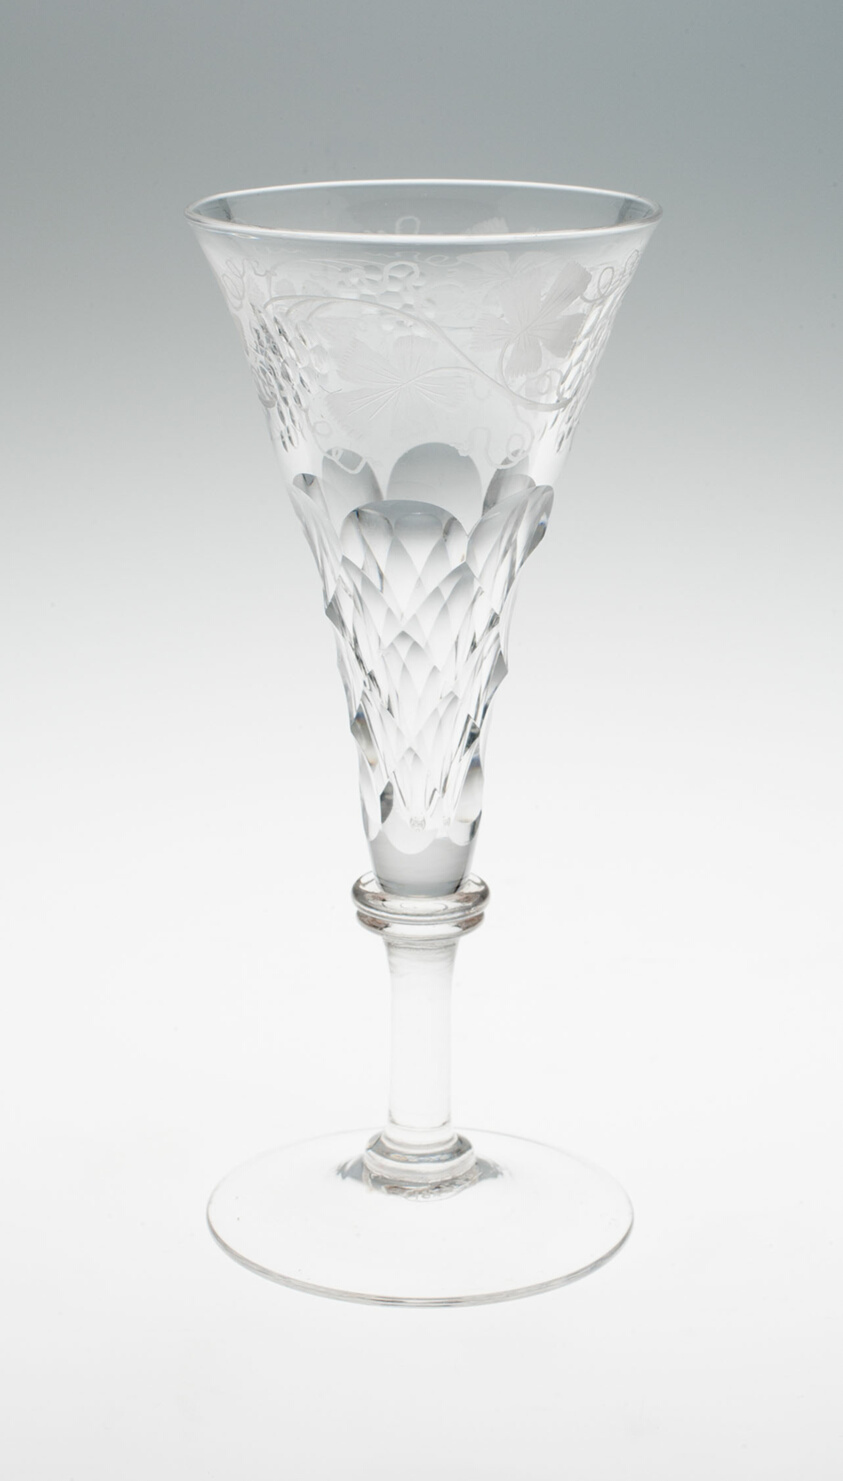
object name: Glass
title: Wine Glass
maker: England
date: c. 1790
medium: Glass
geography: England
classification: drinking vessel; glass; european decorative arts